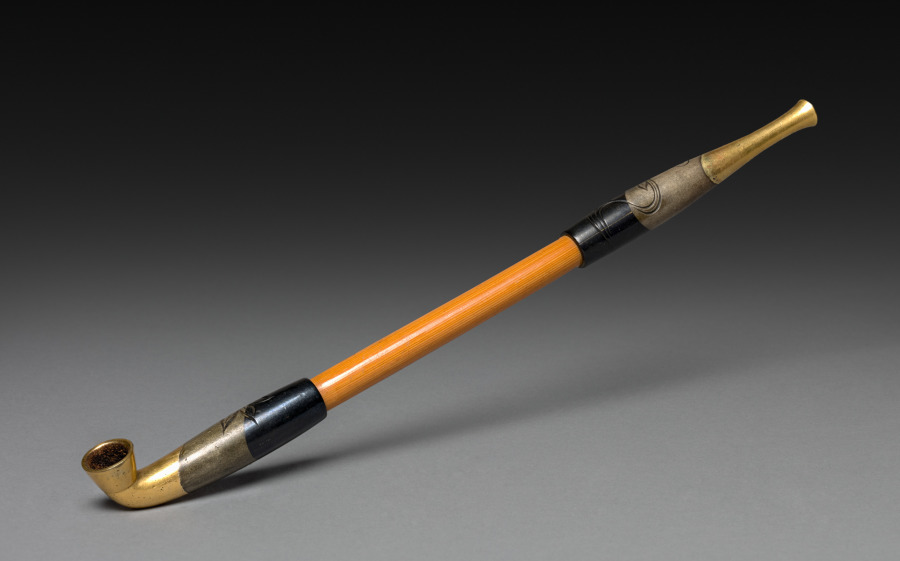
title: Tobacco Pipe with Maple Leaves in a River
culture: Japan, Edo period (1615–1868)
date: early to mid-1800s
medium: bamboo, metal, brass, pewter (?), and iron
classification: Miscellaneous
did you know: A famous Japanese poem describes the Tatsuta River dyed in crimson, a reference to autumn maple leaves floating on its surface, and a likely source for the imagery on this pipe.